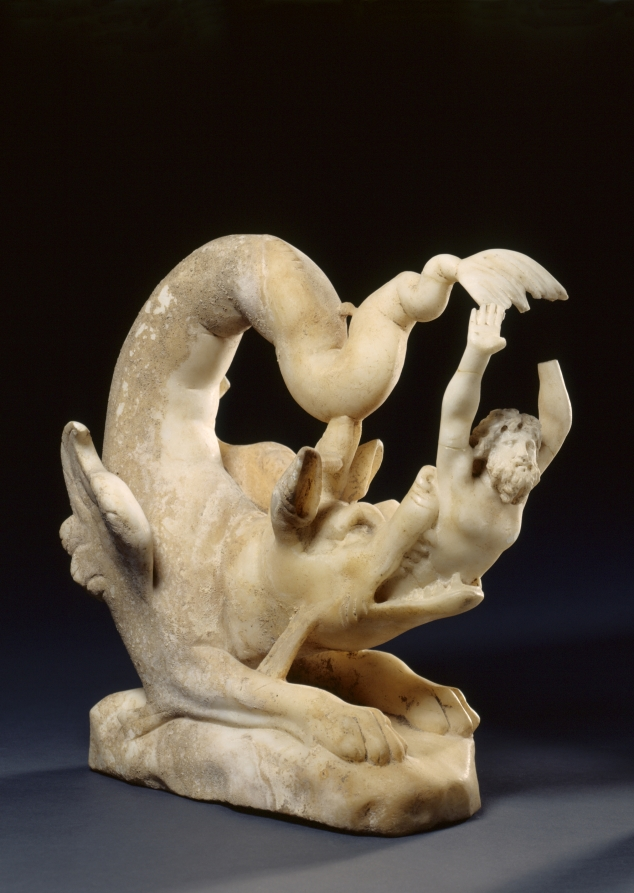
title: Jonah Cast Up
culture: Anatolia, late Roman-early Christian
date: 280–90 CE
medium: marble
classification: Sculpture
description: After disobeying the Lord’s command to proclaim judgment on the city of Nineveh, the Old Testament prophet Jonah was cast into the sea and swallowed by a sea monster. He spent three days praying inside the beast before being cast ashore. Here, the beast spits Jonah out of its mouth.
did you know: The fearsome creature spitting Jonah out of its mouth is a creation of the artist's imagination derived from the ancient Greek cetos, a sea monster. Like other mythical beasts, such as the griffin and the sphinx, this monster combines elements of several different animals. Which ones do you see when looking at this fantastical creature?